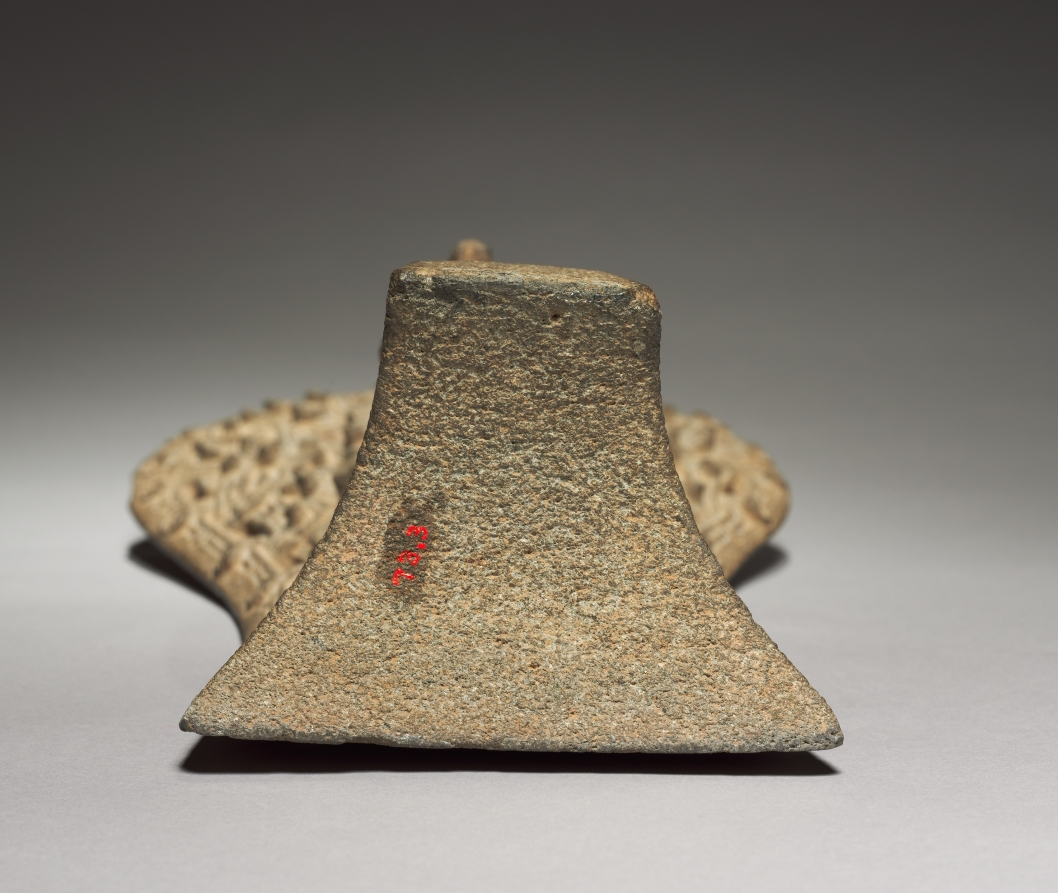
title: Ballgame Palma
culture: Mexico, Gulf Coast, Classic Veracruz style (600-1100)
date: c. 900–1100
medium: stone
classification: Sculpture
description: Stone palmas—so-called today for their palm frond-like shape—are ceremonial sculptures that may replicate lightweight gear worn over the chest during the ballgame. The scene on the back of this palma vividly illustrates the tie between the ballgame and sacrifice. A bat descends from the top, clutching severed human body parts, and at the center an upright figure brandishes a blade over a reclining victim. The scene's many animal figures, including the one on the front, may belong to ballgame mythology that now is lost.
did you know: The Mesoamerican ballgame was played with a hard rubber ball that players bounced off their hips.